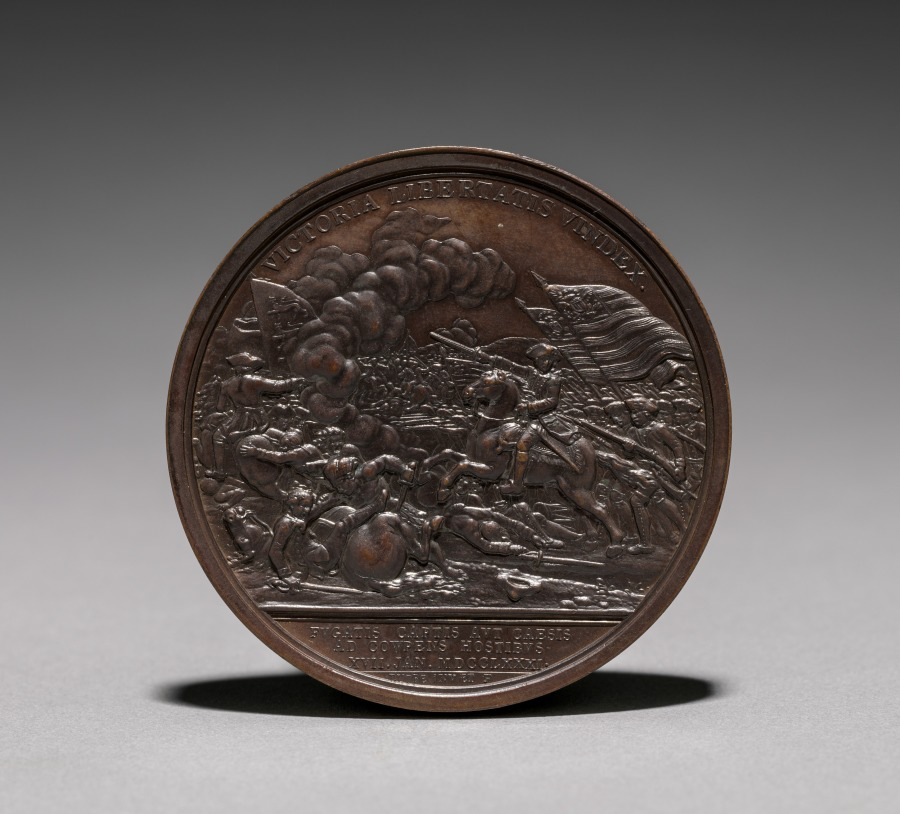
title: Medal: Daniel Morgan (reverse)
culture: France, 19th century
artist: Jules Dupré (French, 1811–1889)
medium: bronze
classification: Metalwork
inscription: Victoria Libertatis Vindix Tvgitas captis avt caesis ad Cowpens Hostibus. XVII Jan. MDCCLXXXI.